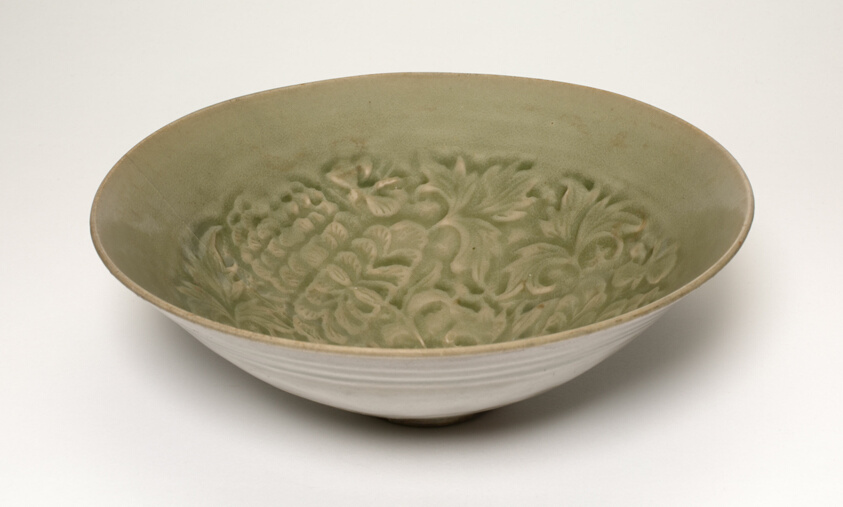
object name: Vessel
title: Bowl with Peonies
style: Chinese (culture or style)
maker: China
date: Song dynasty (960–1279)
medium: Celadon-glazed stoneware with underglaze molded decoration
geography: China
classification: bowl; stoneware; dish (vessel); asian art; ceramics; vessel